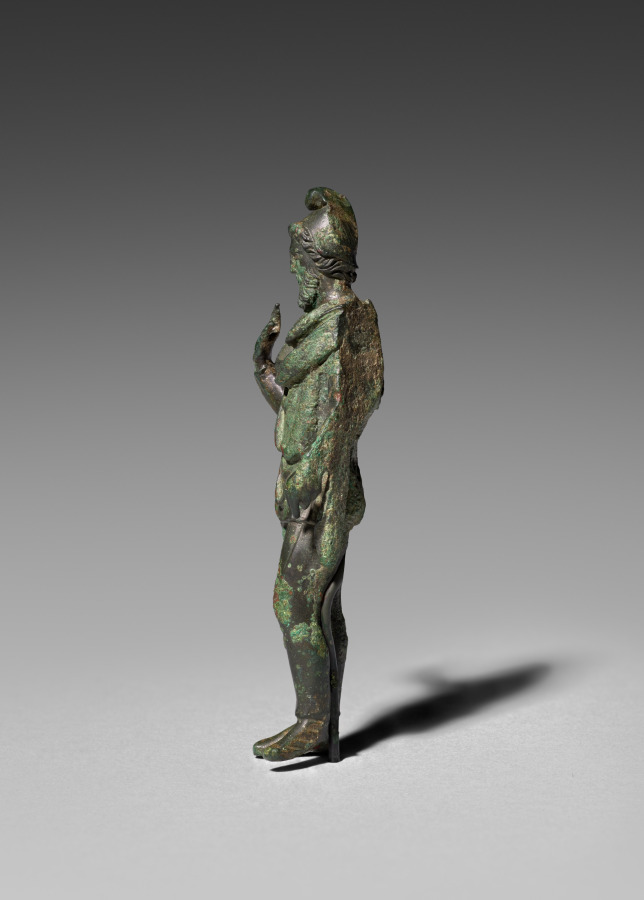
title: Barbarian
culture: Italy, Rome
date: 1–100 CE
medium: bronze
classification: Sculpture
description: This bearded figure wears a tunic, trousers, and a soft conical hat with the apex bent over, called a Phrygian cap. He stands with his right hand raised (missing the index and little finger) and his left leg slightly bent. The figure originally held an implement in his lowered left hand, whose fingers curve around a shaft. The garments and cap identify him as a foreigner, likely a Dacian. Emperor Trajan (reigned AD 98–117) fought two military campaigns against Dacia (modern-day Romania), where he conquered and annexed the southern half of the region.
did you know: This figure may have decorated an ornate parade breastplate on a horse.